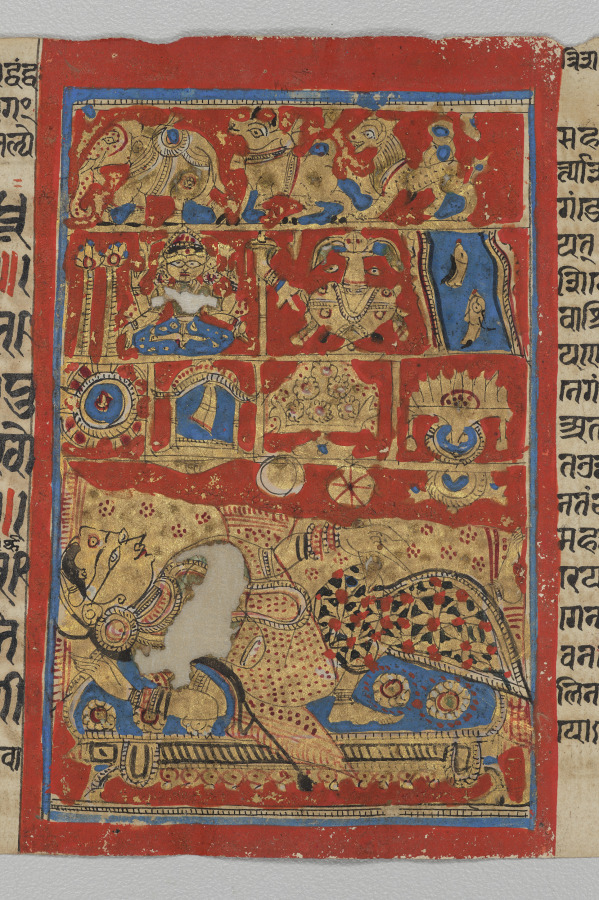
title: The Fourteen Dreams of Queen Trishala, folio 14 (recto), from a Kalpa-sutra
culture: Western India, Gujarat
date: c. 1475–1500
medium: Gum tempera, ink, and gold on paper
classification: Painting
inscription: [[upper right]] triśalā 14 svapna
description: Accounts of the lives of liberated beings of the Jain religion are illuminated with special emphasis on the miraculous circumstances leading to the birth of its historical founder Mahavira (500s BCE). For Jains, liberated beings are not reborn after they die; they exist eternally in a blissful meditative state. After a divinity miraculously implanted the embryo of Mahavira into the womb of Queen Trishala, she dreamed of 14 good omens. Later in the manuscript is an intimate moment between the mother and her special newborn. The bold and costly palette lends the paintings an otherworldly quality.